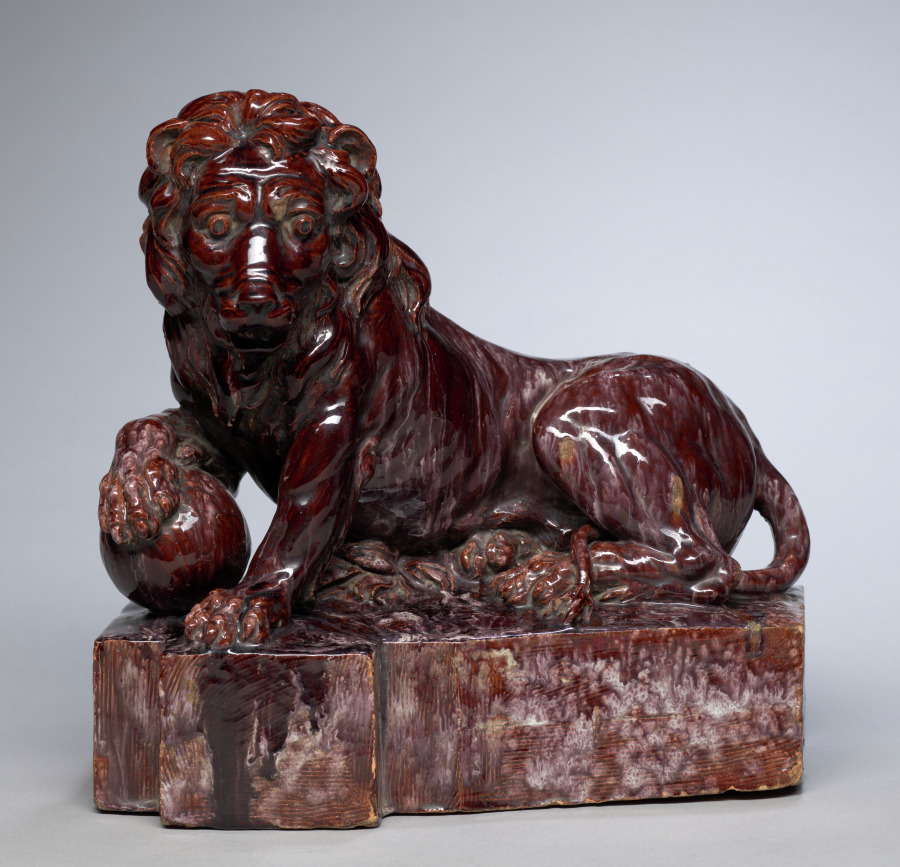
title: Lion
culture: France, 20th century (?)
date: 1900s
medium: terracotta glazed in mottled purple tin glaze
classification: Ceramic